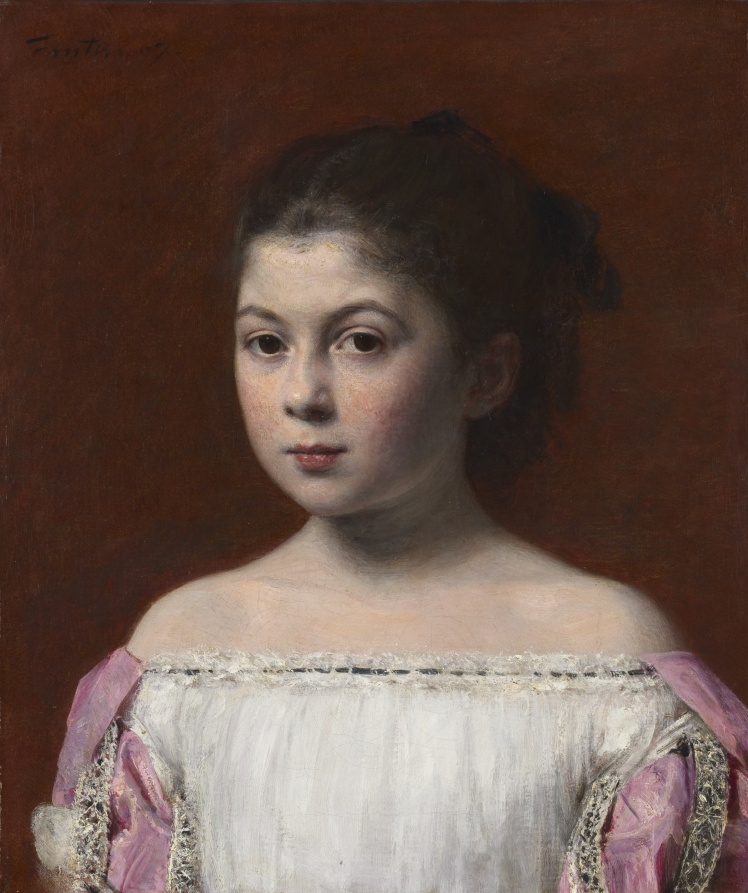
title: Marie-Yolande de Fitz-James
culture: France, 19th century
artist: Henri Fantin-Latour (French, 1836–1904)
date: 1867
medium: oil on fabric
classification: Painting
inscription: Signed upper left: Fantin. 67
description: This portrait depicts Marie-Yolande de Fitz-James, the 12-year-old daughter of Édouard de Fitz-James. Fantin-Latour painted a series of portraits of her family members in preparation for a large group portrait that was never completed. The sitter is elegantly dressed in a pink and white dress, identical to one worn by her elder sister, Françoise, for her portrait. Marie-Yolande wears no jewelry and her hair is styled more simply, as would have been suitable for a girl of her age at the time.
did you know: Fantin-Latour, known for his portraits and flower still lifes, never shared the artistic viewpoint of his friends and contemporaries, the Impressionists. He remained a traditional academic painter throughout his career and the style of this portrait reflects the romanticism of an earlier generation.